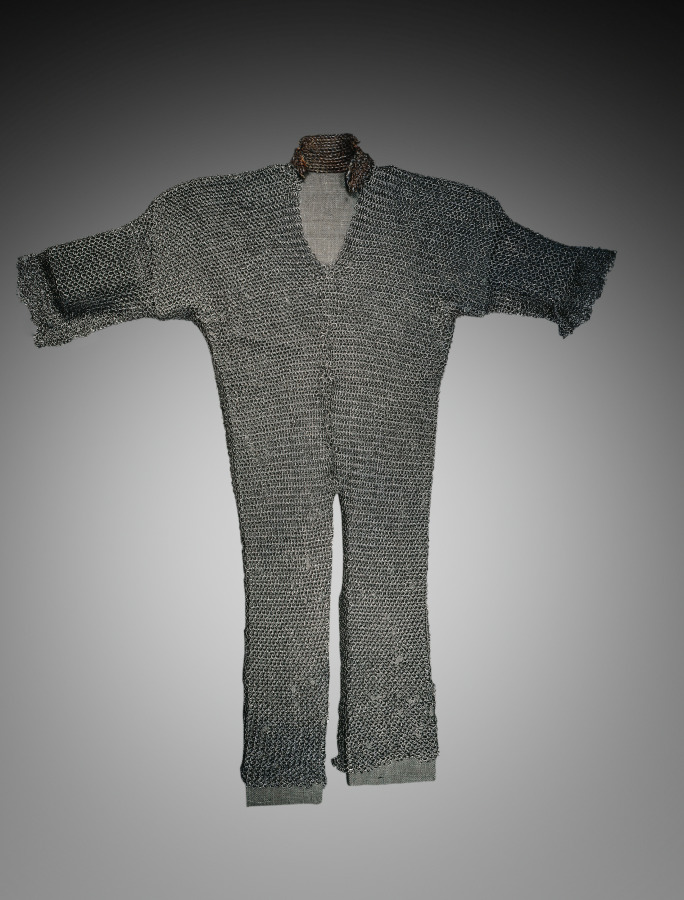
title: Hauberk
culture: European, 15th century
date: 1400s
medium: fine steel rings; leather collar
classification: Arms and Armor